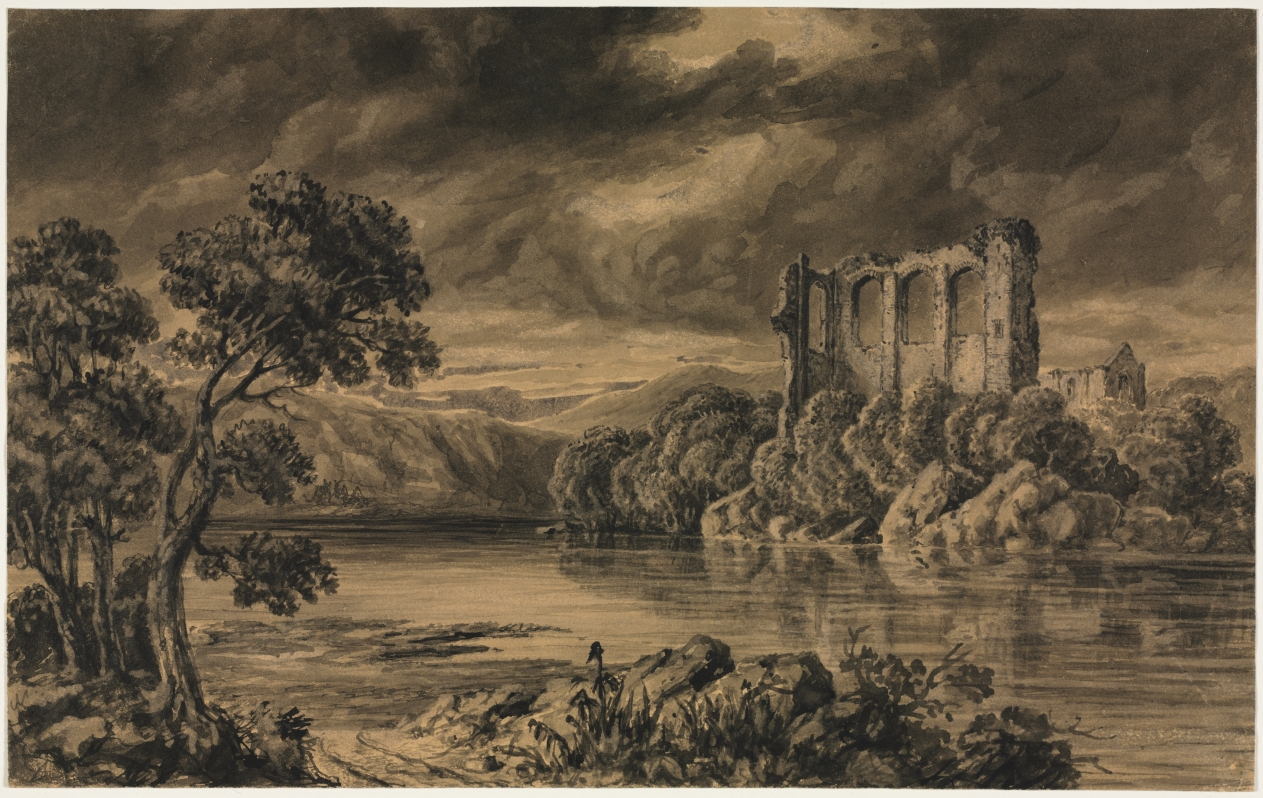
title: Egremont Castle, Cumberland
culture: England, 19th century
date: 1800s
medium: ink and wash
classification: Drawing